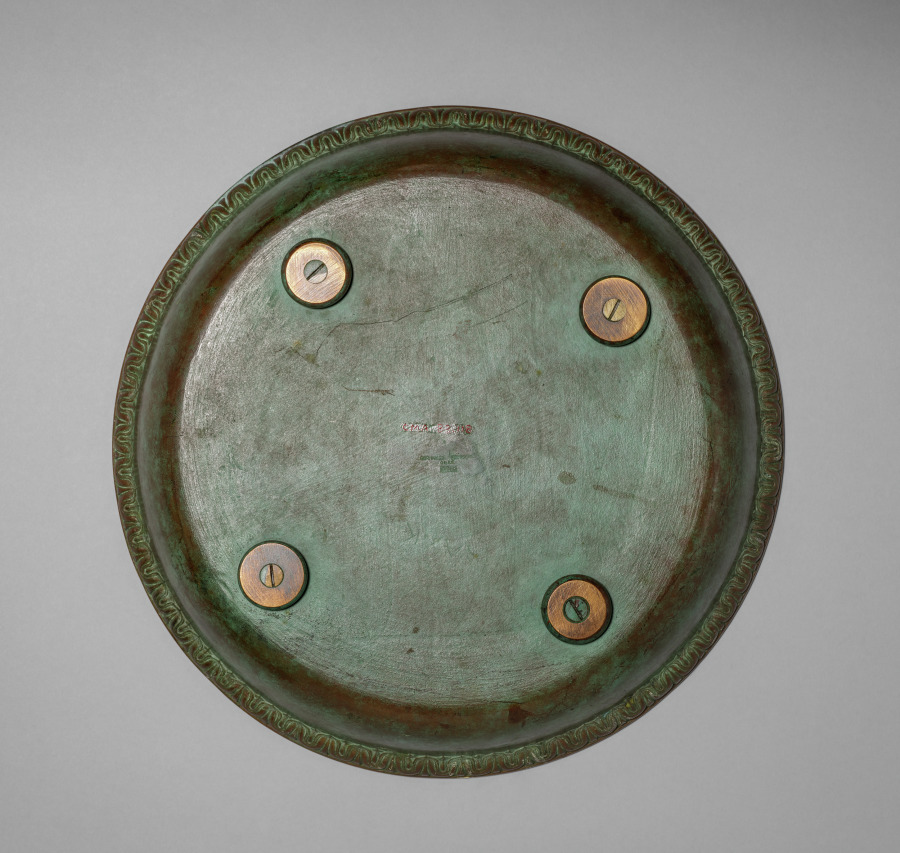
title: Basin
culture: America, New York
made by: Gorham Manufacturing Company (America, est. 1831)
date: early 1900s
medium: bronze, greenish black artificial patina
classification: Metalwork